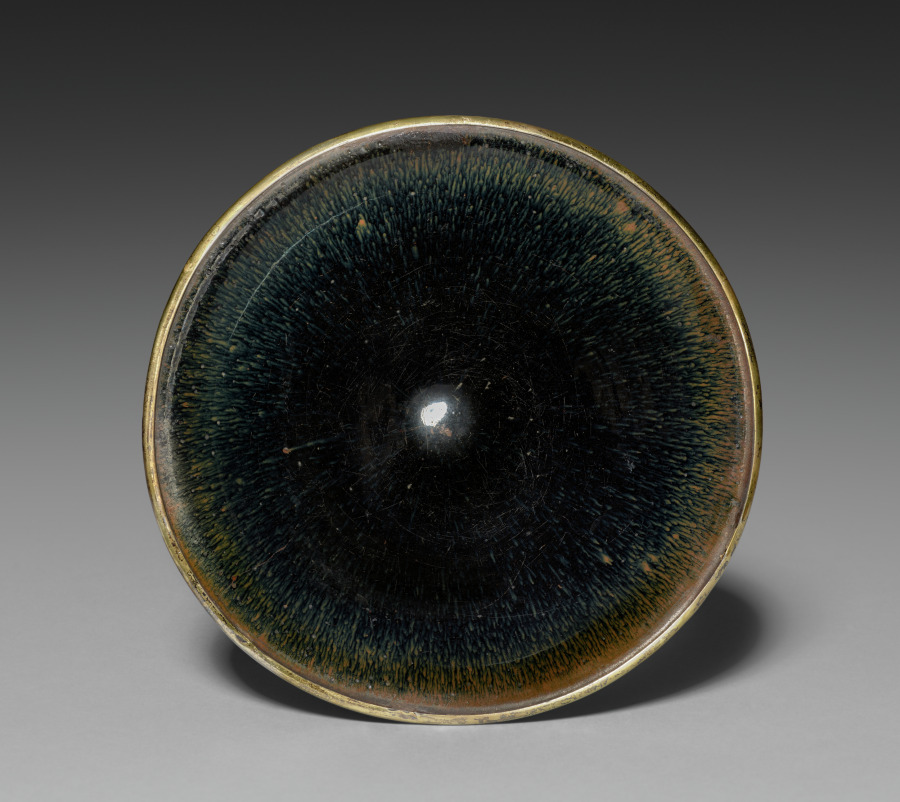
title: Tea Bowl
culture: China, Fujian province, Southern Song dynasty (1127-1279)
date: 1100s–1200s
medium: Stoneware with black “hare’s fur” glaze and metal-bound rim, Jian ware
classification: Ceramic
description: Due to its exceptional size, this Fujian tea bowl is rather rare. The enjoyment of Jian ware rests with the glaze transmutation due to iron in the glaze, which developed into reddish-brown streaks and spots against a rich black glaze after firing. Connoisseurs called these iron formations "hare’s fur" marks, and the ware was very popular with the tea cultures in China and Japan.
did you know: The reddish-brown streaks and spots have been affectionately termed "hare's fur" among connoisseurs.